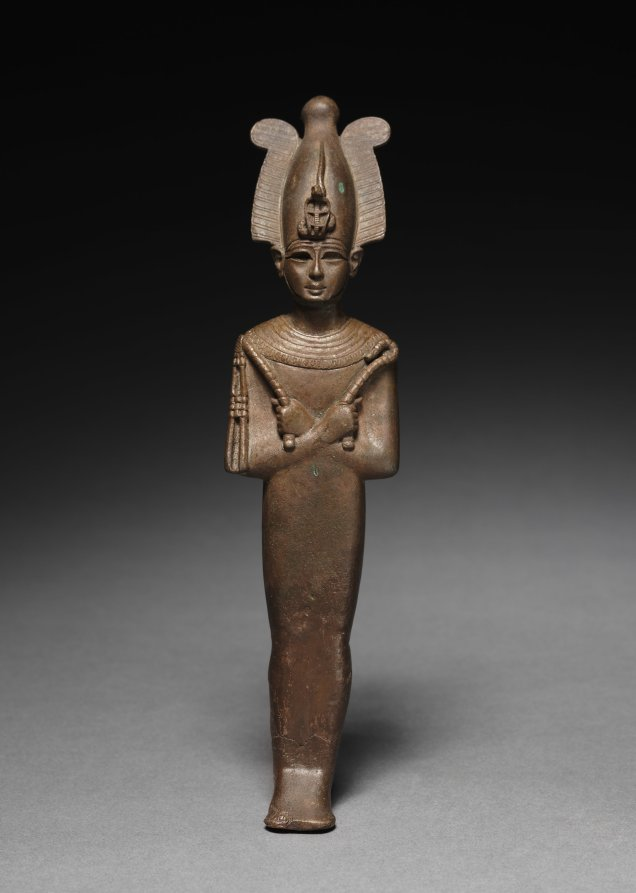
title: Statuette of Osiris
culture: Egypt, Late period (715–332 BCE), Dynasty 26 or later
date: 664–525 BCE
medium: bronze, hollow cast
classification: Sculpture